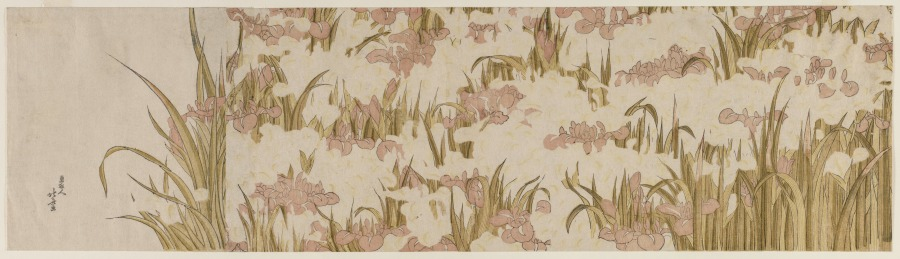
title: White and Purple Irises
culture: Japan, Edo period (1615–1868)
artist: Katsushika Hokusai (Japanese, 1760–1849)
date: early 1800s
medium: color woodblock print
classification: Print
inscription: Signature: Gakyokin Hokusai ga